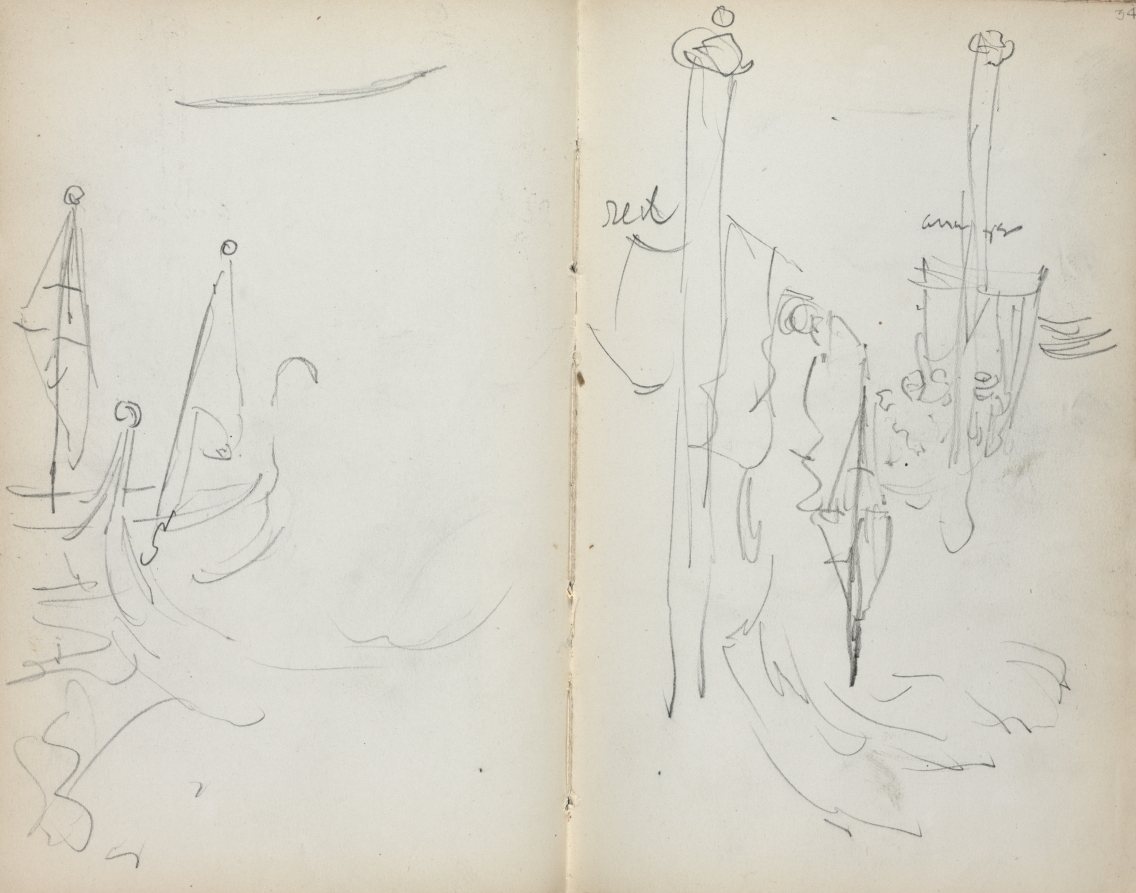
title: Italian Sketchbook: Venetian Harbor View (page 33 & 34)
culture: America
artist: Maurice Prendergast (American, born Newfoundland [now Canada], 1858–1924)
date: 1898–1899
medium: pencil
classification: Bound Volume